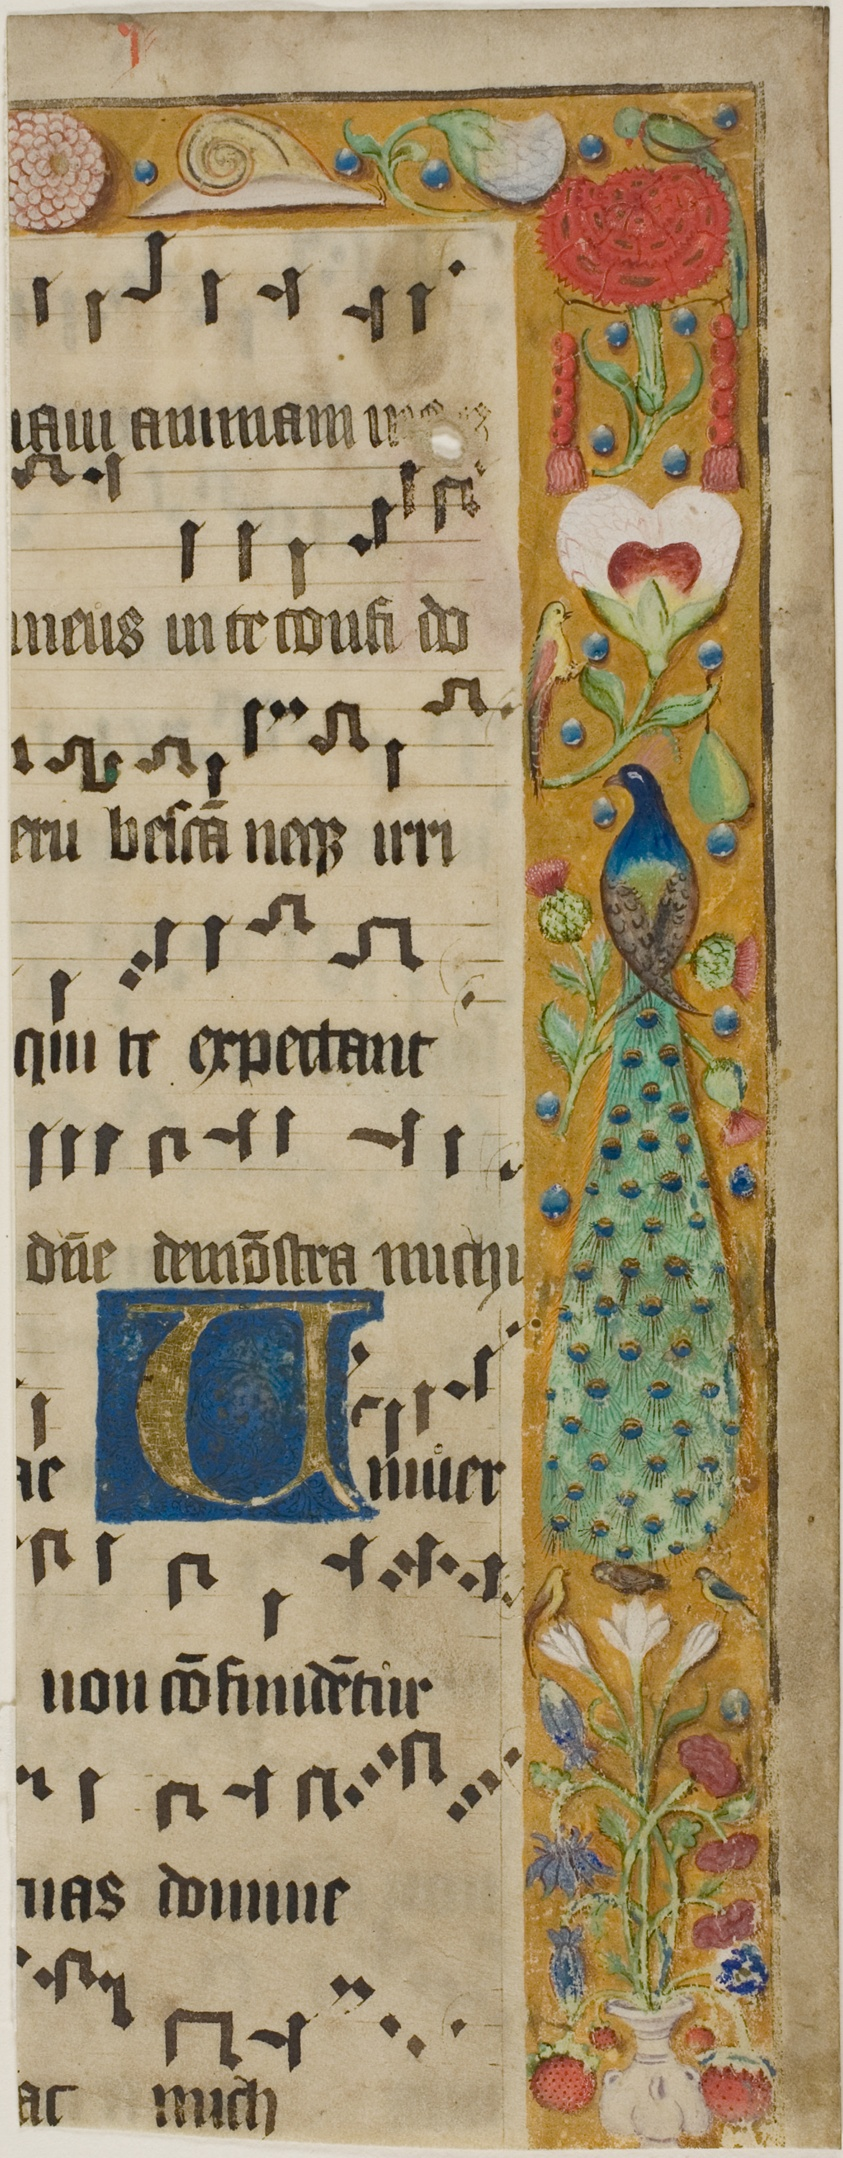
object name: Drawing and Watercolor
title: Peacock, Birds, Flowers, Fruit and a Snail in a Decorated Border, with an Illuminated Initial "U" from a Choir Book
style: medieval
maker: European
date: n.d., probably modern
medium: Manuscript cutting in tempera, with some incising, and gold leaf, and with Latin inscriptions in brownish-black ink, ruled in light brown ink, on vellum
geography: Europe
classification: tempera; manuscript; drawings (visual works); prints and drawing